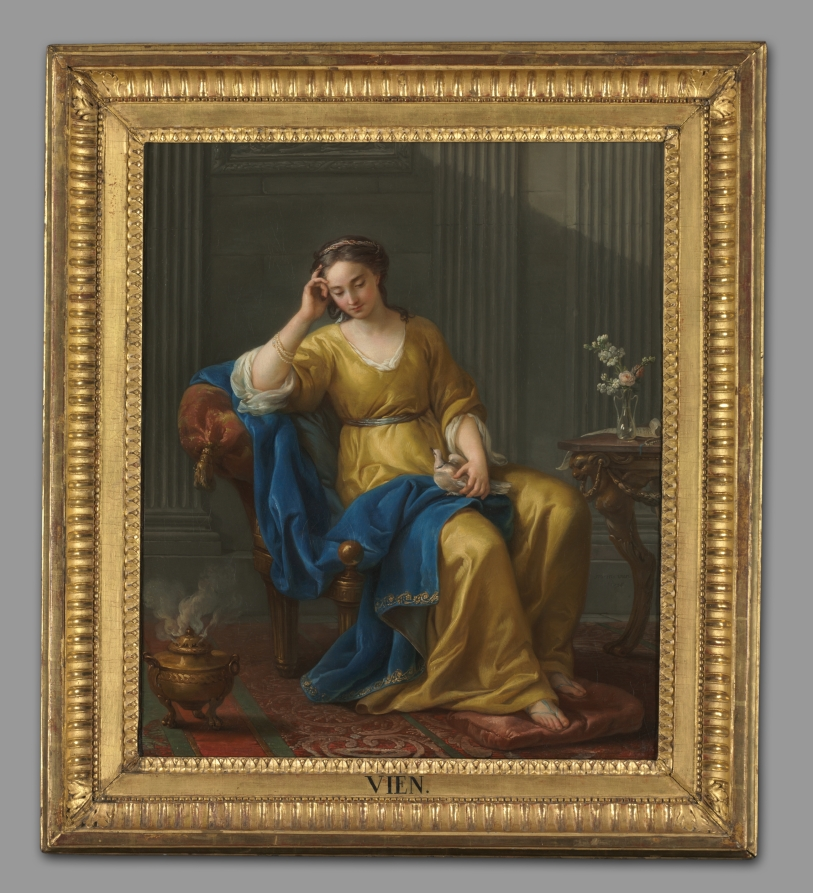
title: Sweet Melancholy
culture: France, 18th century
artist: Joseph-Marie Vien (French, 1716–1809)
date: 1756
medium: oil on canvas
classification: Painting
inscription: Signed lower right: "jos. m. vien / 1756"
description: The chair, brazier, table, and the setting all show Vien's interest in bringing archaeological accuracy to a new level of precision. Yet his delicate handling and graceful palette derive squarely from 18th-century French painting. The gesture of the melancholic figure, with her head on her hand, has roots going back to the Renaissance. Nonetheless, the painting has a wistful rather than tragic tone. Indeed, images of women in interiors, contemplating a letter with longing or sadness, derive from earlier Dutch paintings of daily life, here transformed into an ancient context.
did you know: Look closely—three strands of pearls appear in this painting.